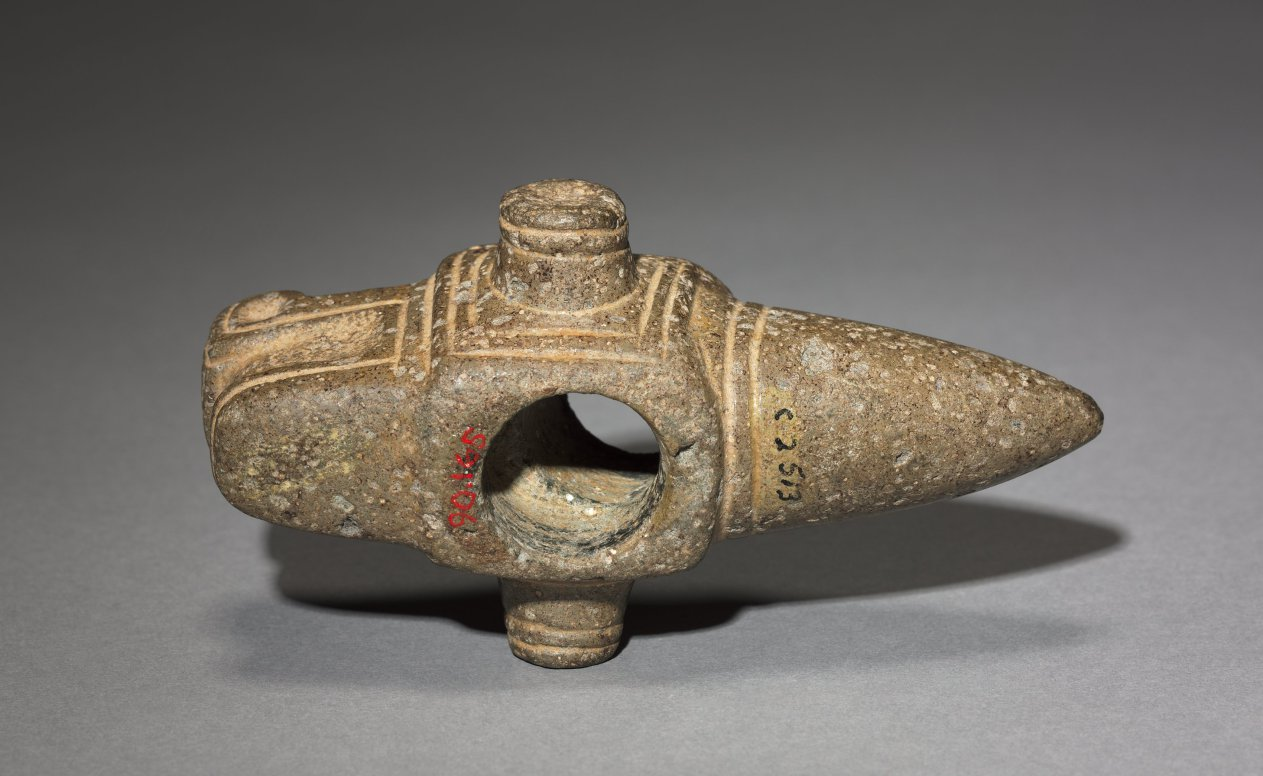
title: Mace Head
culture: Costa Rica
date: 300–500 CE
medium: pecked and polished gray stone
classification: Sculpture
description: Once mounted on wooden shafts, elaborately shaped mace (club) heads like this one probably were not used as weapons. Rather, they could have served as emblems of chiefly authority, group insignia, the heads of ceremonial weapons, or all three. They eventually were placed in elite graves. The back-curled nose on this example may refer to a crocodile or caiman.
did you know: In ancient Costa Rica, it was believed that the world rested on the back of a crocodile.